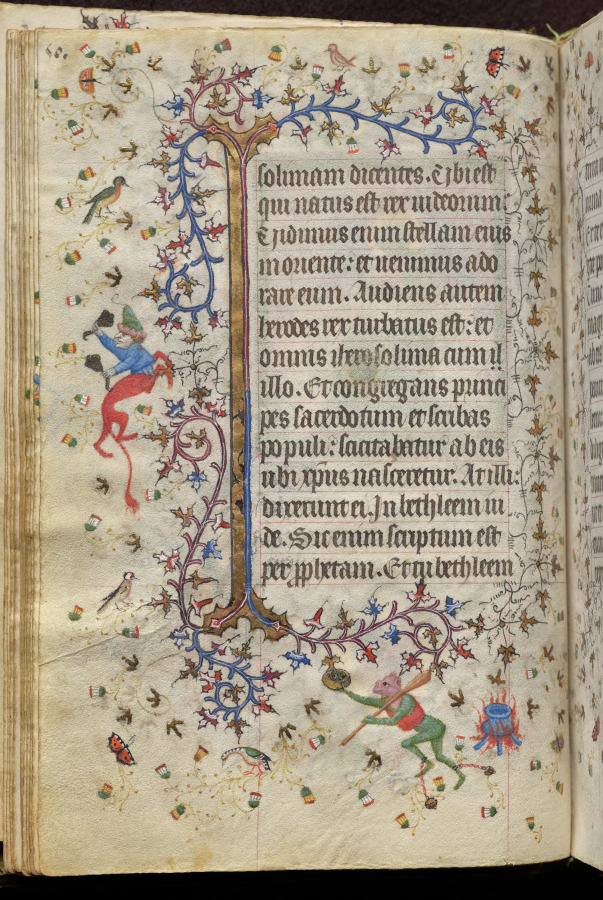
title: Hours of Charles the Noble, King of Navarre (1361-1425): fol. 25v, Text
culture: France, Paris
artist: Master of the Brussels Initials and Associates (French)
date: c. 1405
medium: ink, tempera, and gold on vellum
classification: Bound Volume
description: This precious volume was obviously highly prized by its owner, the French-born King of Navarre, who had his coat of arms painted on no less than twenty folios. Rather than directly commissioning this manuscript from a specific workshop, it seems that Charles the Noble acquired his book of hours -- perhaps ready-made for the luxury market -- while on a trip to Paris in 1404-05. A collaborative effort, six painting styles are evidenced within the pages of this codex, those of two Italians, two Frenchmen, and two Netherlanders. The painter who was responsible for the planning and decoration of the book, and who produced seventeen of the large miniatures, was a Bolognese artist known as the Master of the Brussels Initials. His principal assistant, responsible for most of the borders, was a Florentine who signed his name "Zecho" da Firenze on folio 208 verso.